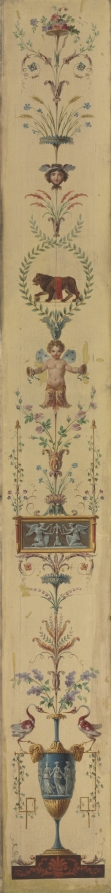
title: Decorative Panel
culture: France, 18th century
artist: Pierre Rousseau (French, 1751–1829)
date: 1790s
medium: oil on canvas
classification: Painting